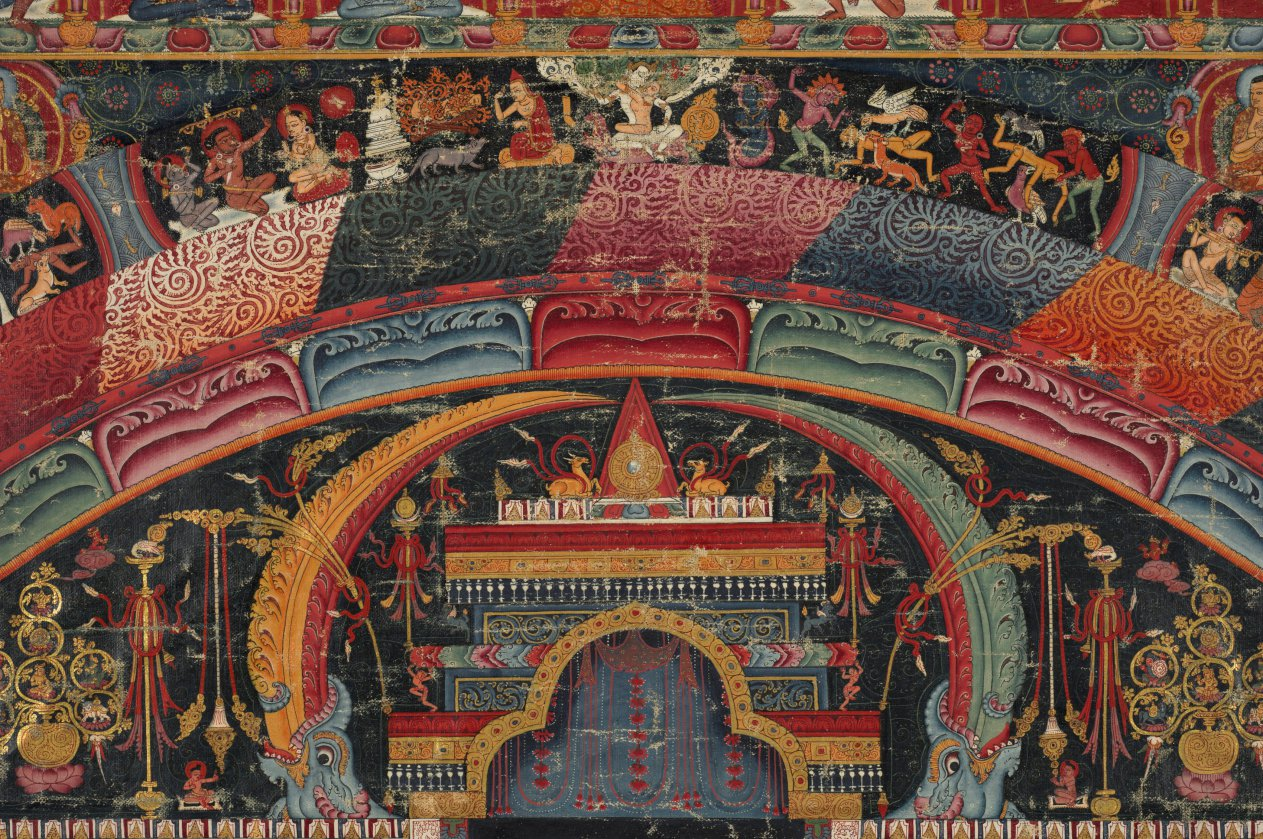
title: Twenty-three Deity Nairatma Mandala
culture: Central Tibet, Sakya-affiliated monastery, 14th century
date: c. 1375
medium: Gum tempera, ink, and gold on cloth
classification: Painting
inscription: The inscription along the bottom says: Twenty-three deity Nairatma Mandala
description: One of the main types of imagery in tantric Buddhist art is the mandala, a two-dimensional diagram of the realm of an enlightened being. This mandala depicts the palace of Nairatma, who dances in the center surrounded by her entourage. Using the painting as a guide, the tantric practitioner in meditation mentally projects the two-dimensional plan into three-dimensional space and enters into it. The outermost ring contains depictions of the cremation grounds, where corpses are being burned and consumed, as well as tantric yogis and masters who work there in order to understand the impermanence of the body, defeat their fear of death, and overcome irrational aversions to impure aspects of life. Virupa is depicted twice, always pointing to arrest the sun with his raised left hand. He sits among the row of lineage masters along the top edge, and is also depicted in the topmost segment of the ring of cremation grounds, being served a cup of liquor. Along with lineage masters at the top of this impressive painting, bodhisattvas and important masters are depicted in the spandrels, each identified by an inscription.